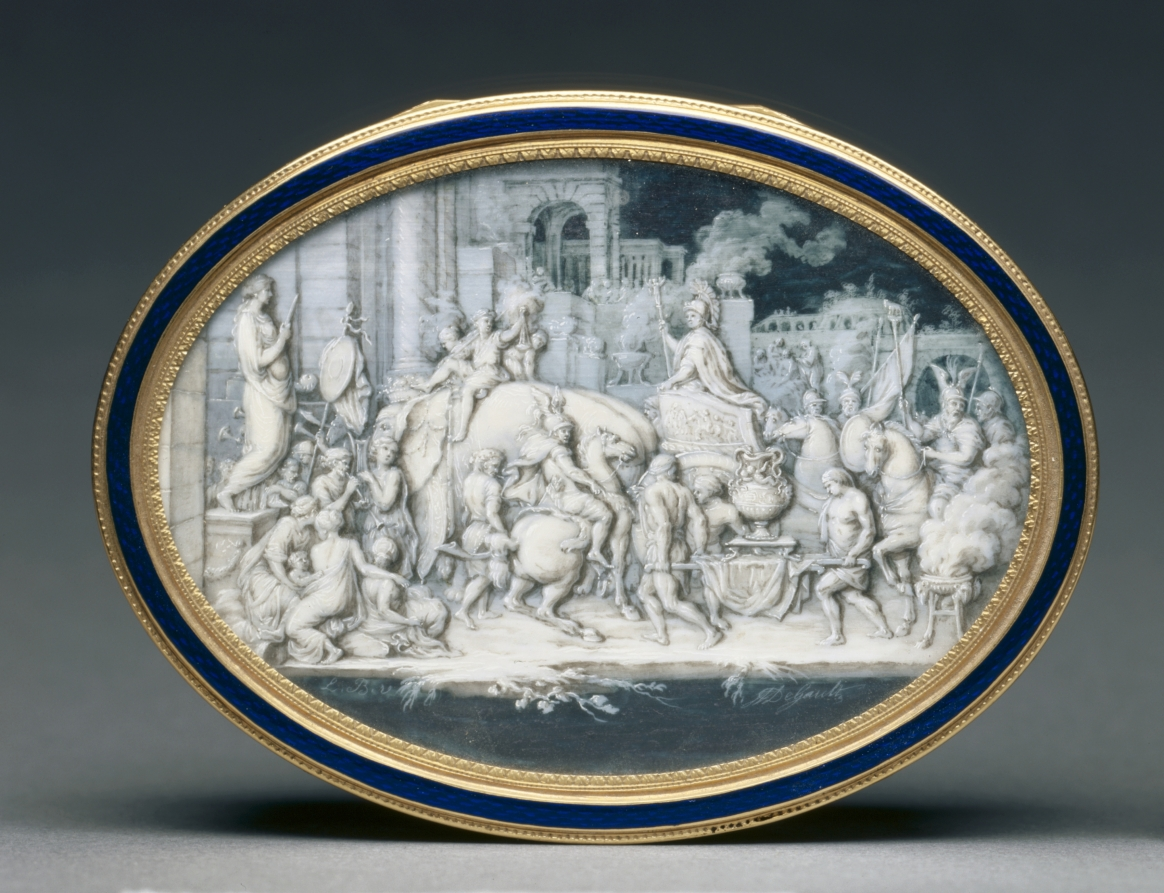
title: Snuff Box (Tabatière)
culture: France, 18th century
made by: Pierre Marie Gault De Saint-Germain (French, 1754–1842)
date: 1779–80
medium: gold and enamel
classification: Miscellaneous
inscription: [Warden's mark for Paris, 1779-1780, inside bottom; inside cover]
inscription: [Illegible maker's mark, inside bottom; inside cover]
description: Decorated with images derived from ancient Greek and Roman history in the style of cameos, intricately carved gemstones, this box evokes the rising neoclassical imagery in France. The scenes on the box recount several key events in the life of Alexander the Great. The enameled works were inspired by a series of prints by Sébastien Leclerc which drew from a series of paintings by Charles Le Brun.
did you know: The original series painted by Charles Le Brun, The Battles of Alexander (Les Batailles d’Alexandre) (1600s), was commissioned by King Louis XIV of France.